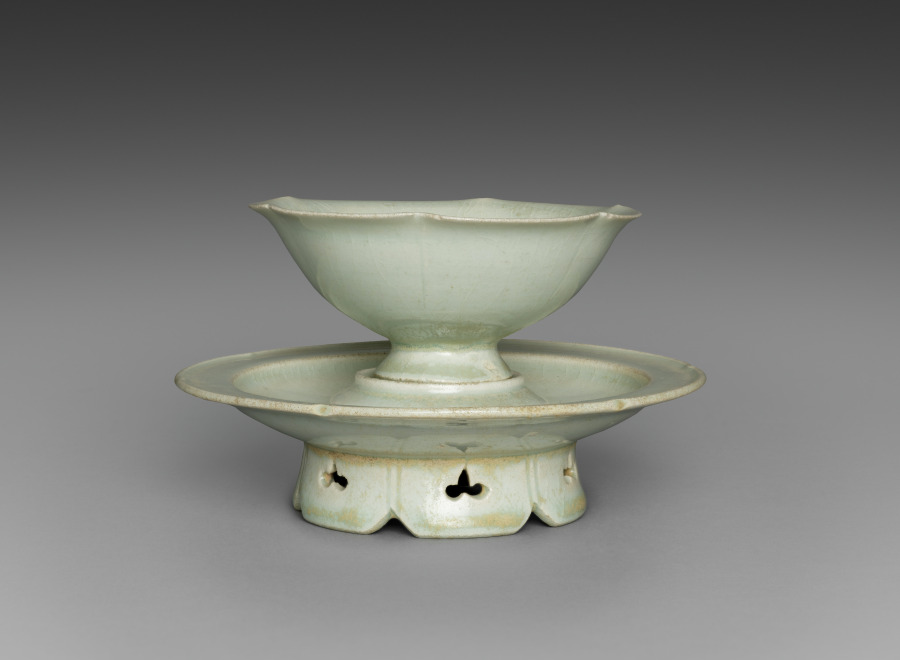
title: Cup and Stand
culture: China, Jiangxi province, Jingdezhen, Southern Song dynasty (1127-1279)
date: 1100s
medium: Porcelain with pale bluish-white glaze, qingbai ("blue-white") ware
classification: Ceramic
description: The kilns of Jingdezhen in Jiangxi province produced an extremely delicate porcelain made from the local resources of kaolin (white China clay) and petuntse (a feldspathic rock called china stone). It is glazed with a clear bluish-white glaze, thus the name qingbai (blue-white) or yingqing (shadowy blue) for this type of ware.